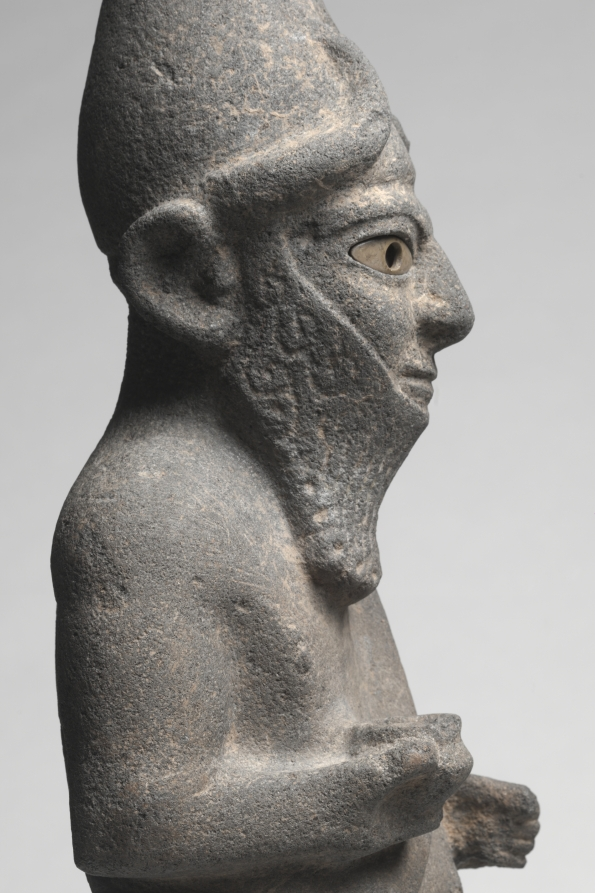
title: Priest-King or Deity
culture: Hittite, North Syria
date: c. 1600 BCE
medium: basalt with bone eyes (left, ancient; right, restored)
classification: Sculpture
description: The Hittites migrated into Anatolia in the 3rd millennium BCE and spoke an Indo-European language, a group that includes Greek, Latin, Persian, Sanskrit, English, and most modern European languages. They were the first ancient people to use iron for weapons. From about 1600–1200 BCE their empire was at its peak, extending from central Anatolia to Syria, and south along the eastern Mediterranean. Their vast empire and interest in commerce enabled the Hittites to spread Mesopotamian ideas and culture throughout the ancient Mediterranean world. This large basalt sculpture is exceptionally rare in depicting a Hittite god or priest-king wearing a horned conical crown, false beard, and long robe. He holds a bowl in his right hand and once held something in his left, perhaps a staff or sword.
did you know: The left eye of the sculpture is the original bone inlay while the right eye is a modern restoration done after the piece was damaged.